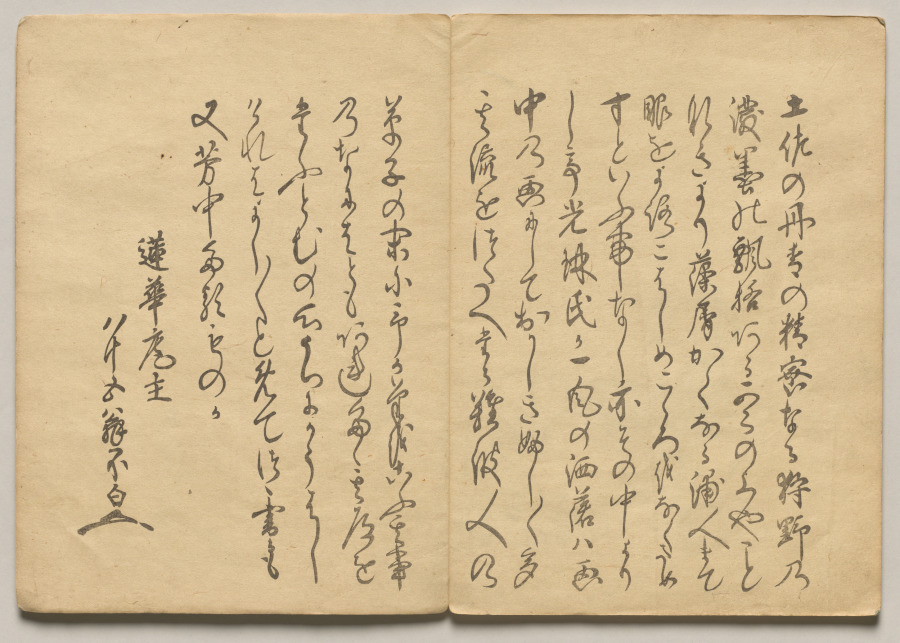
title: Scene from The Kōrin Picture Book (Volume 1)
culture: Japan, Edo period (1615–1868)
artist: Nakamura Hōchū (Japanese, d. 1819)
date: 1800s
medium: color woodblock printed book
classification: Bound Volume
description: Ogata Korin (1658-1716) was one of the most admired artists of Rimpa, or "decorative school painting." These books by the charming later-generation Rimpa artist Hochu record Korin's inventive designs.